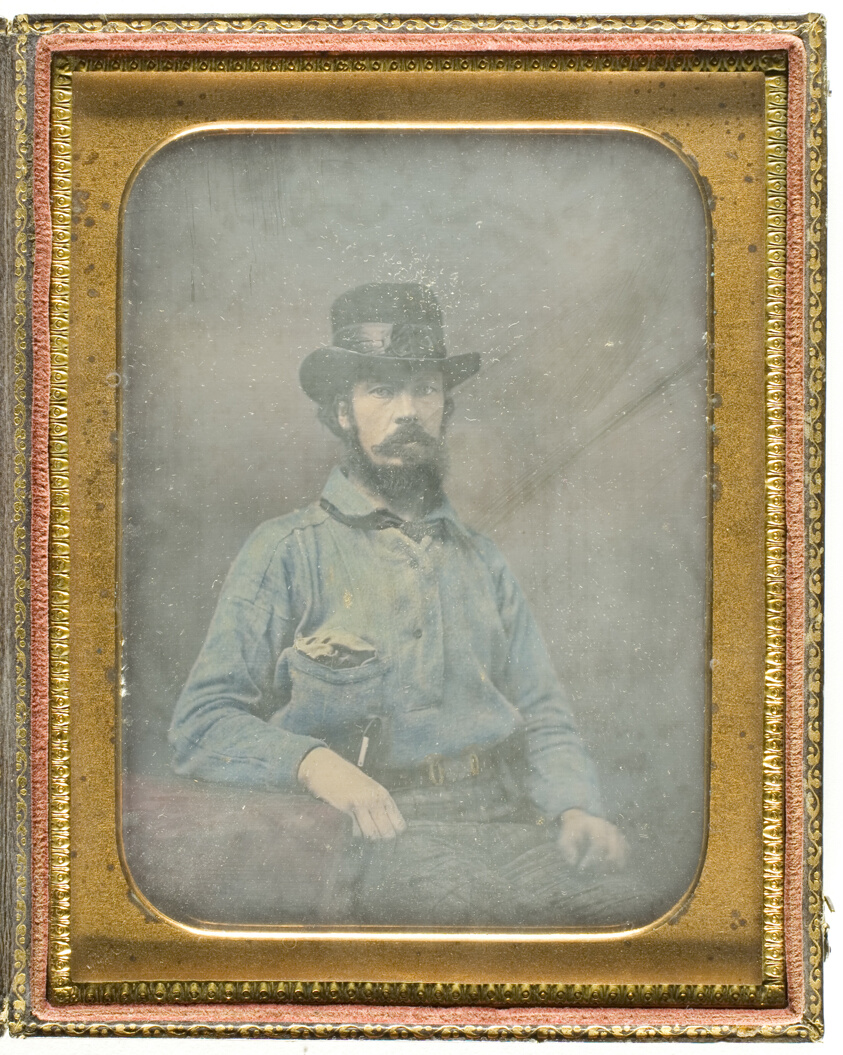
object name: Photograph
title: Untitled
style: 19th century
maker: Artist unknown; American, 19th century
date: c. 1850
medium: Daguerreotype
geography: United States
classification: daguerreotype; photographic process; photography; photograph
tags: Collected by Hugh Edwards